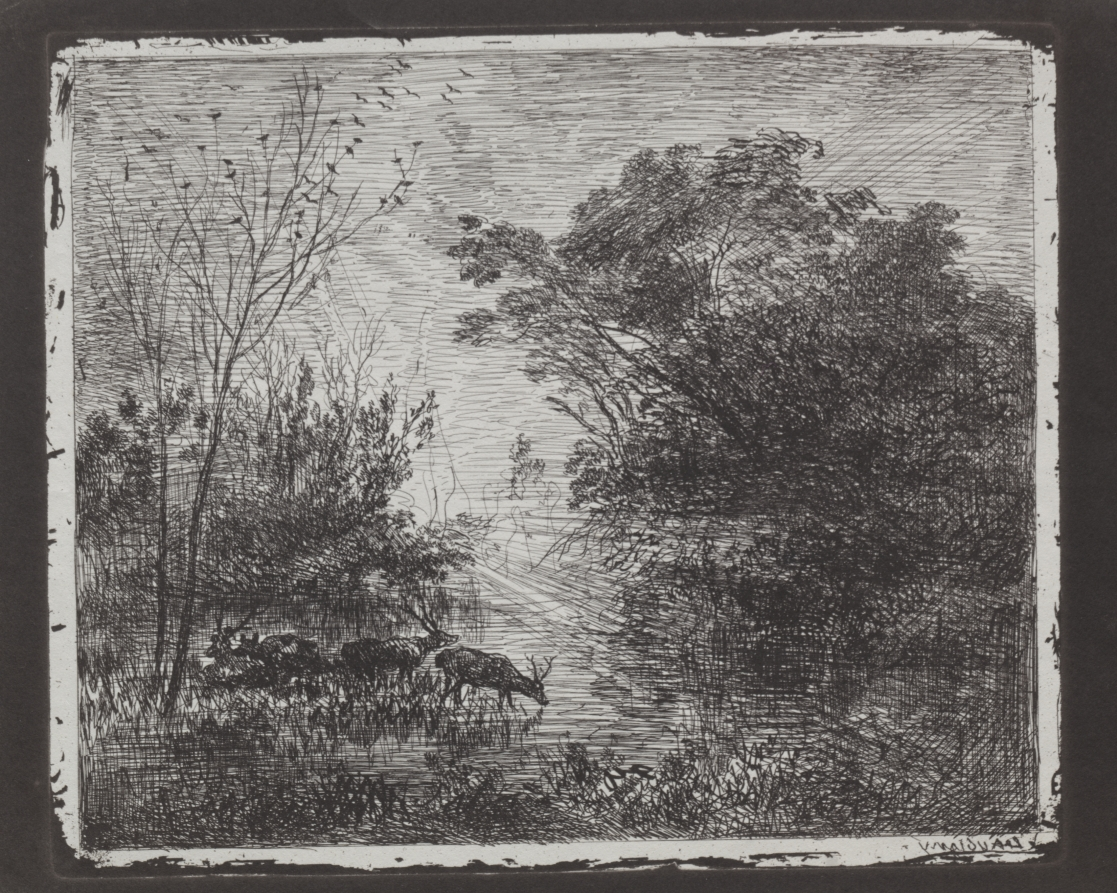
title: Deer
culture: France, 19th century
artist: Charles François Daubigny (French, 1817–1878)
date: c. 1862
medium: cliché-verre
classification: Print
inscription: signed, lower right, in glass negative: Daubigny (in reverse)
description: Around 1853 a few artists and photography buffs who were searching for a photographic method of producing multiple prints developed the cliché-verre. A glass plate is coated with an opaque ground through which the design is drawn with a sharp instrument. The plate is then placed on top of a sheet of light-sensitive paper and exposed to light so that the image is reproduced on the paper.